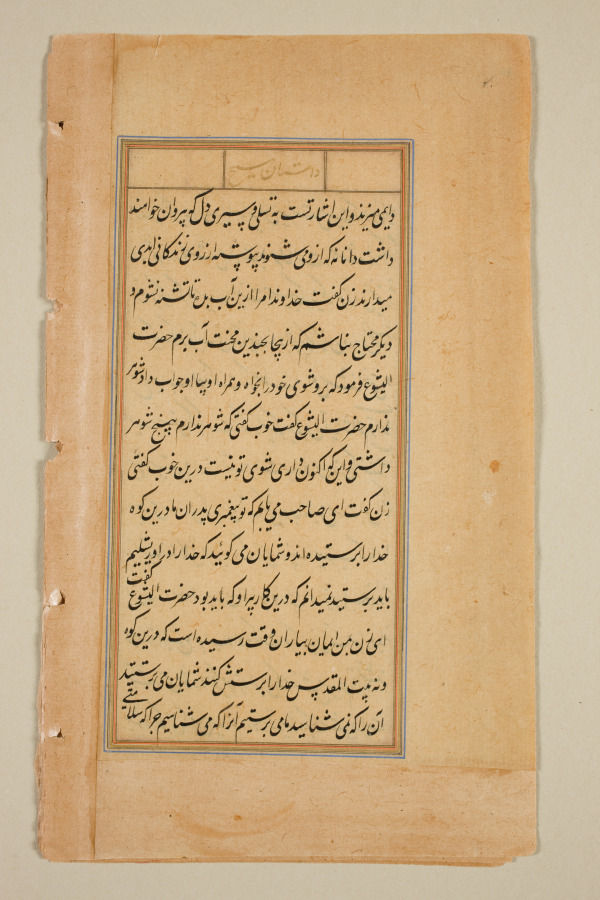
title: Text page from a Mirror of Holiness (Mir’at al-quds) of Father Jerome Xavier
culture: Mughal India, Allahabad, made for Prince Salim (1569–1627)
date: 1602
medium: Ink and gold on paper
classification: Manuscript